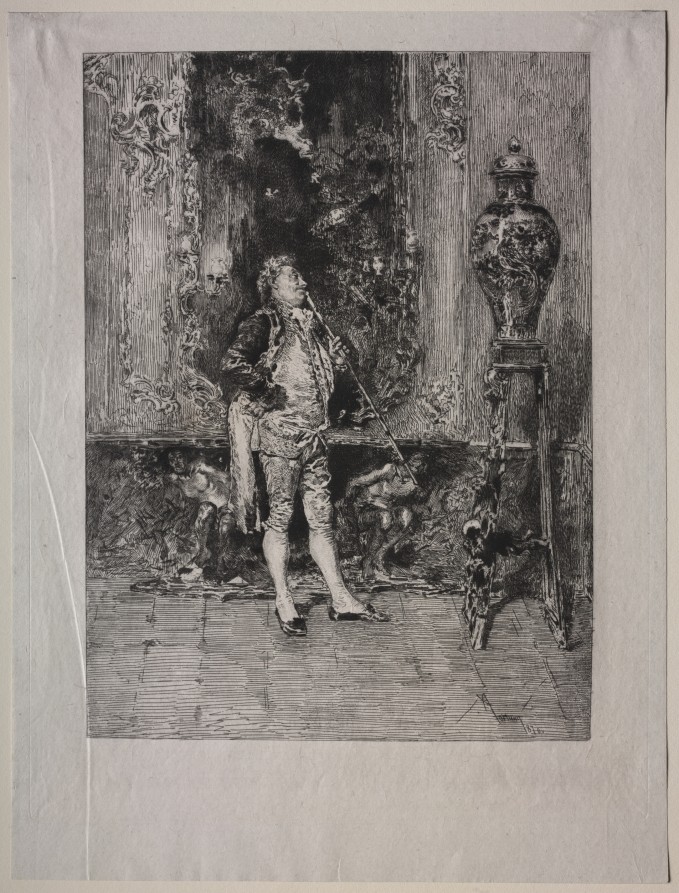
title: Interior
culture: Spain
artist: Mariano Fortuny (Spanish, 1838–1874)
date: 1870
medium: etching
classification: Print